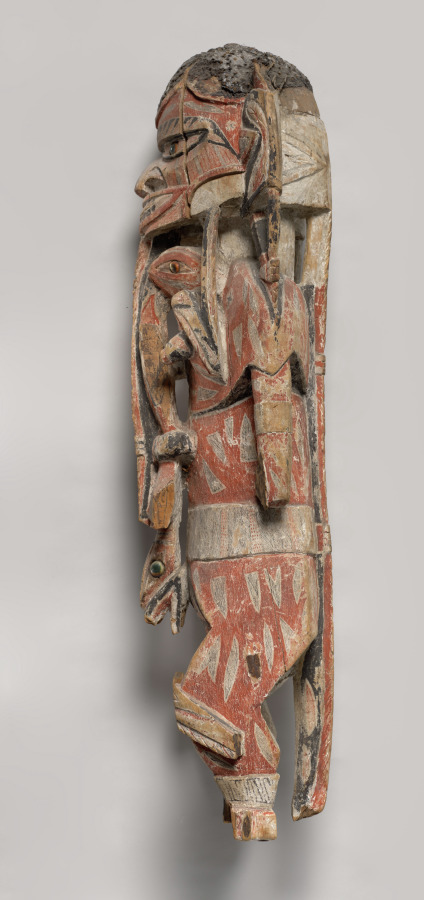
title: Malagan Memorial Festival Pole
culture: Melanesia, New Ireland, 19th century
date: 1800s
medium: painted wood, sea snail opercula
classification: Sculpture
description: At the death of an important individual in New Ireland society, villagers begin preparations for an elaborate funeral (malagan) ceremony. Food is collected for feasts, and artists are commissioned to carve elaborate sculptures and masks. Neighboring groups are invited to the ceremonies, which last for days and include speeches, dancing, music, feasts, and exchanges of goods. The ceremonies climax in the display of the elaborately carved, brightly painted art works. After the guests' departure, the malagan sculptures and masks are discarded, or sometimes stored.